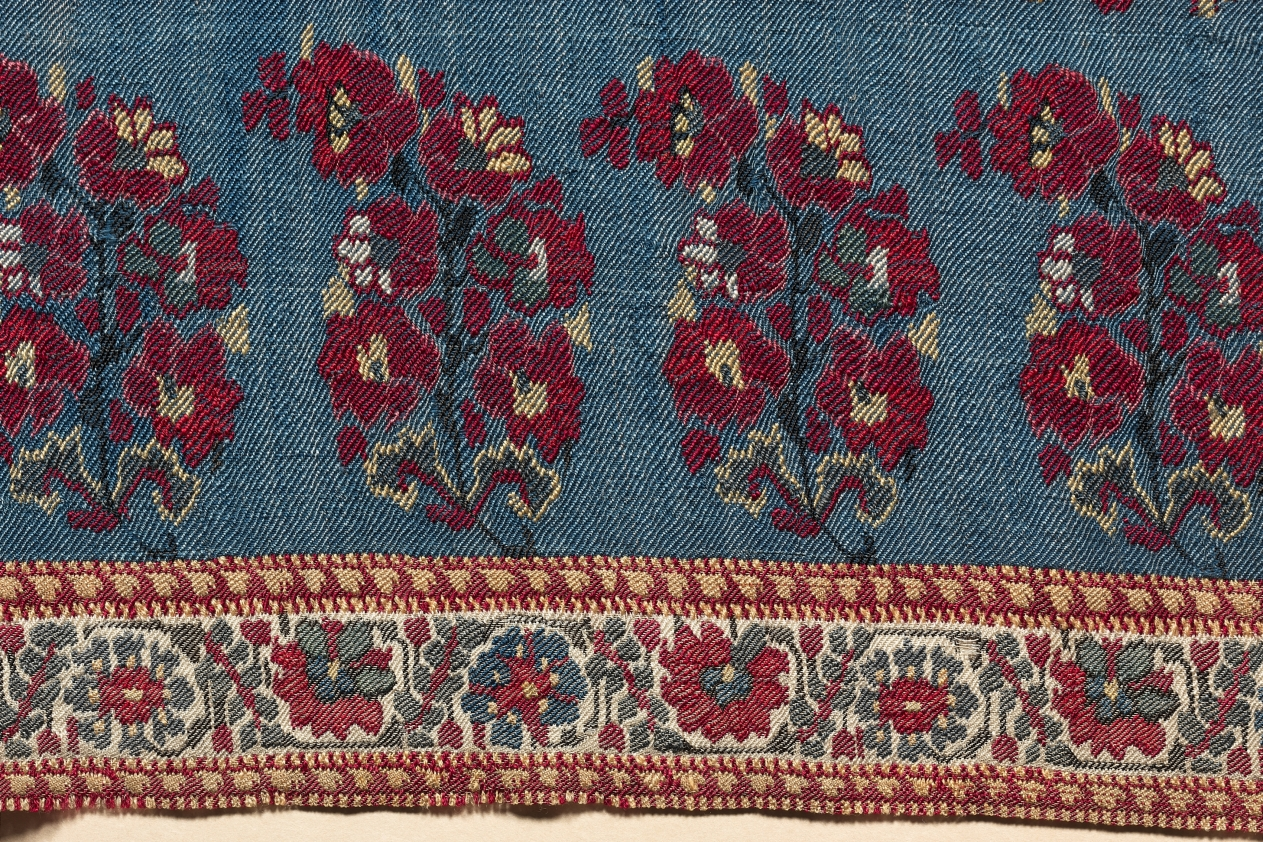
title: Shawl with boteh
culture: India, Kashmir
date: 1820–1830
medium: 2/2 twill tapestry weave, double interlocked: wool, possibly pashmina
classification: Textile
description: Thousands of luxurious shawls imported from Kashmir, India, were status symbols that European-manufactured imitations could not equal. Those woven in Paisley, Scotland, gave rise to the popular term paisley. Their representation in portraits records the evolution of shawl fashions, which helps to date surviving examples. The coveted quality of Kashmir shawls was achieved with luxurious fine goat hair woven in twill tapestry to form small colorful blossoms. Such shawls are lightweight, supple, and warm. A plethora of blossoms arranged in small vases on stands form the large paisley or boteh motifs, while smaller versions enliven the sides of the field. Such floral displays evolved from blossoming plants possibly in 16th-century India.